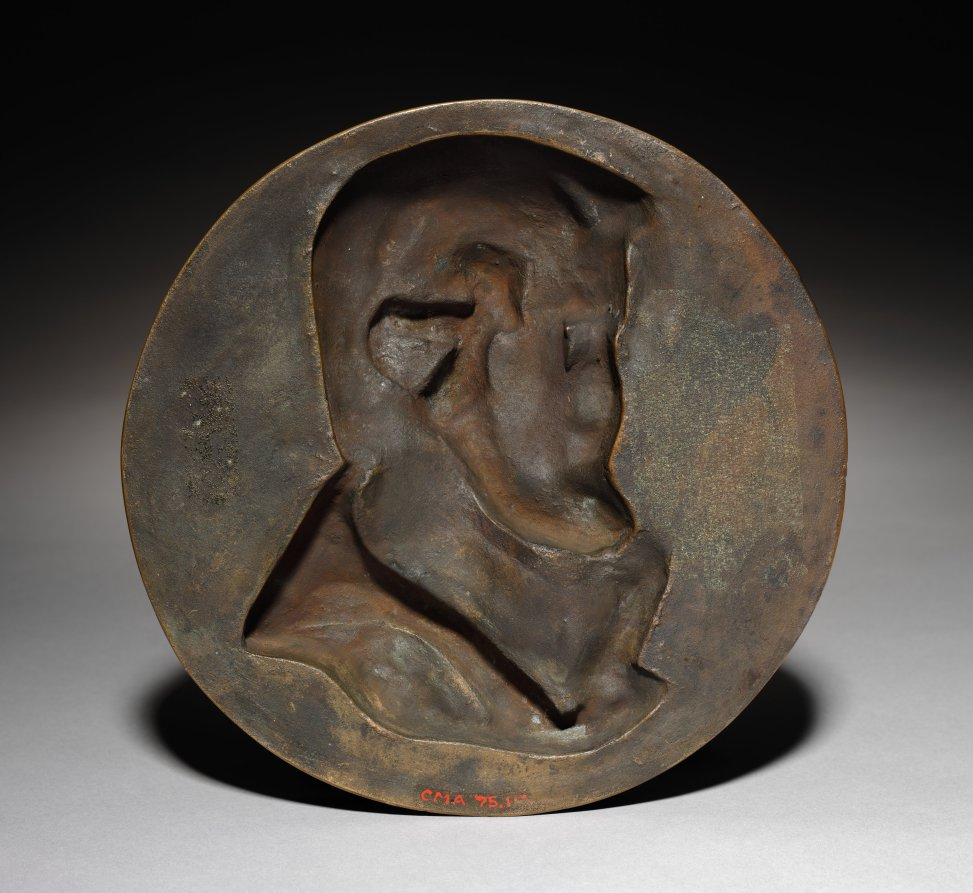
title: Portrait Medallion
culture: France, 19th century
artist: Jean-Auguste Barre (French, 1811–1896)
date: 1830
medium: bronze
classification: Sculpture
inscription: inscribed directly below portrait: AUG BARRE F.T 1830.